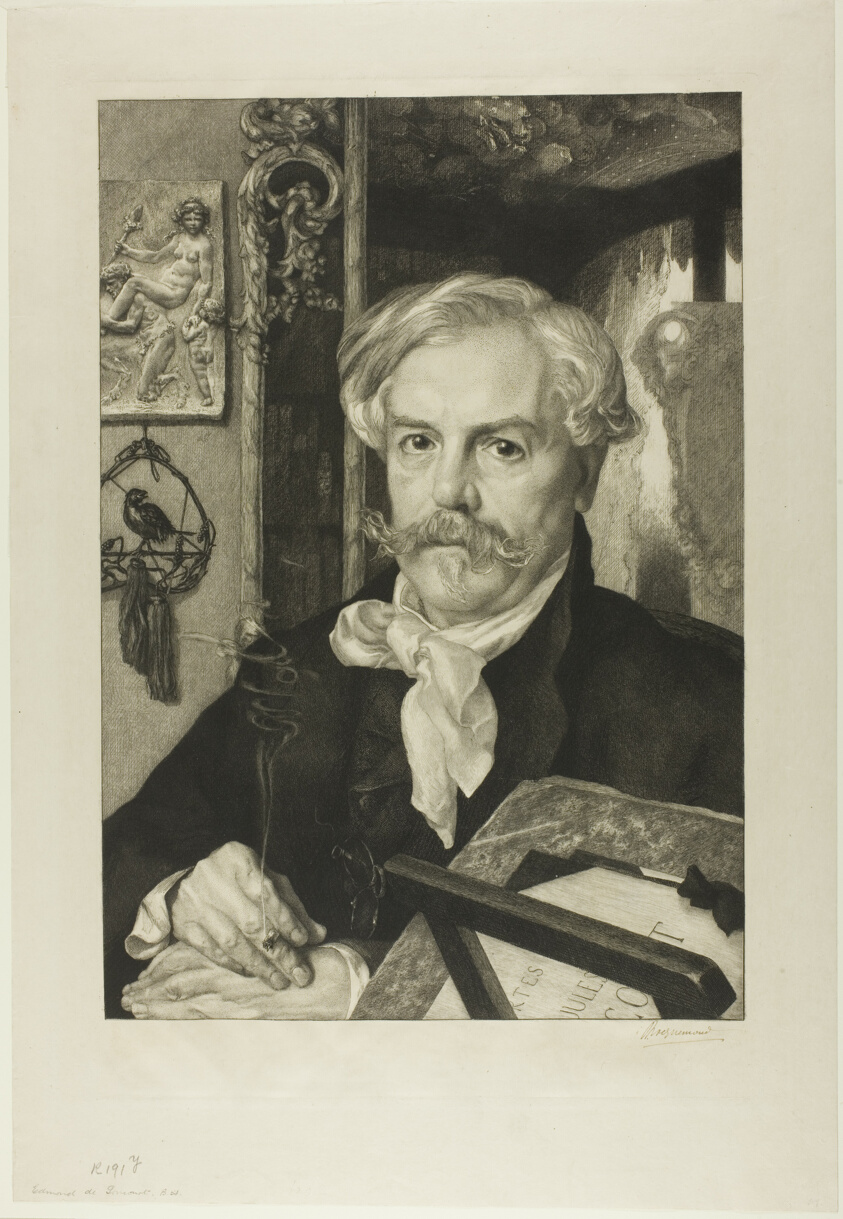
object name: Print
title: Portrait of Edmond de Goncourt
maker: Felix Bracquemond; French, 1833–1914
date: 1882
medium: Etching on cream wove paper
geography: France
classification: etching; print; prints and drawing